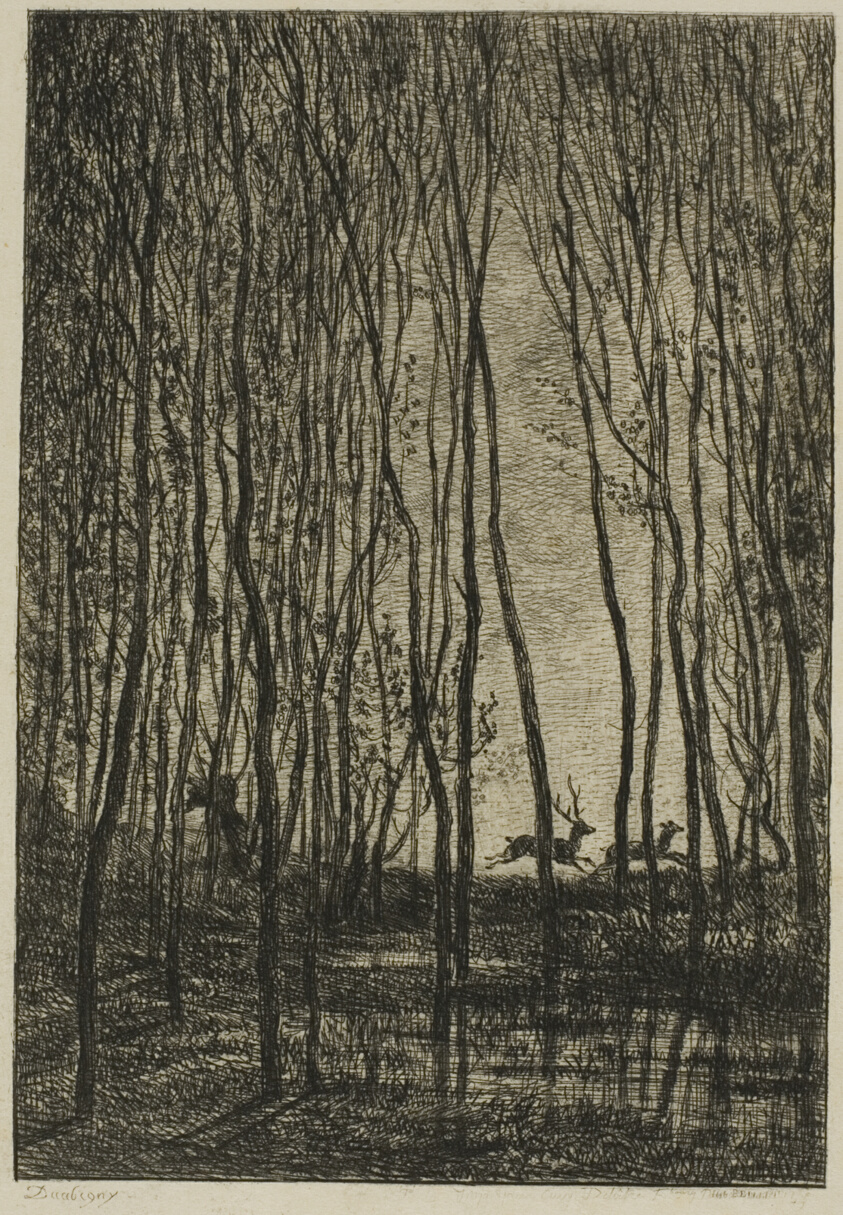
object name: Print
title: Stags in the Woods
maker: Charles François Daubigny (French, 1817-1878)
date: 1850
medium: Etching on cream Japanese paper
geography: France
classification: etching; print; prints and drawing